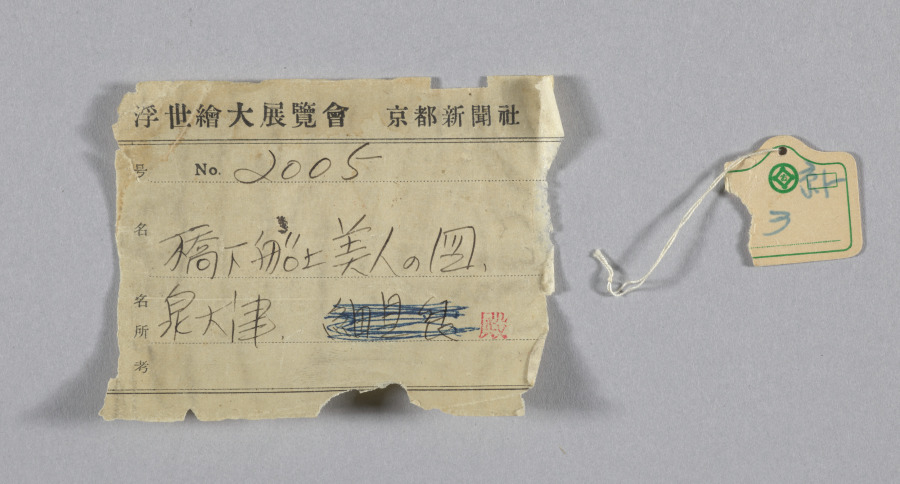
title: Beauty in a Boat on Sumida River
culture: Japan, Edo period (1615–1868)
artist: Chōbunsai Eishi (Japanese, 1756–1829)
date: c. 1801–4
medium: hanging scroll; ink and color on silk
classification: Painting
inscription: artist's signature 栄之筆 and seal, lower right.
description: The Sumida River was a popular refuge from the heat and humidity of the city during the summer. One can see the torii gate of Mimeguri Shrine just to the left of the woman's fan.